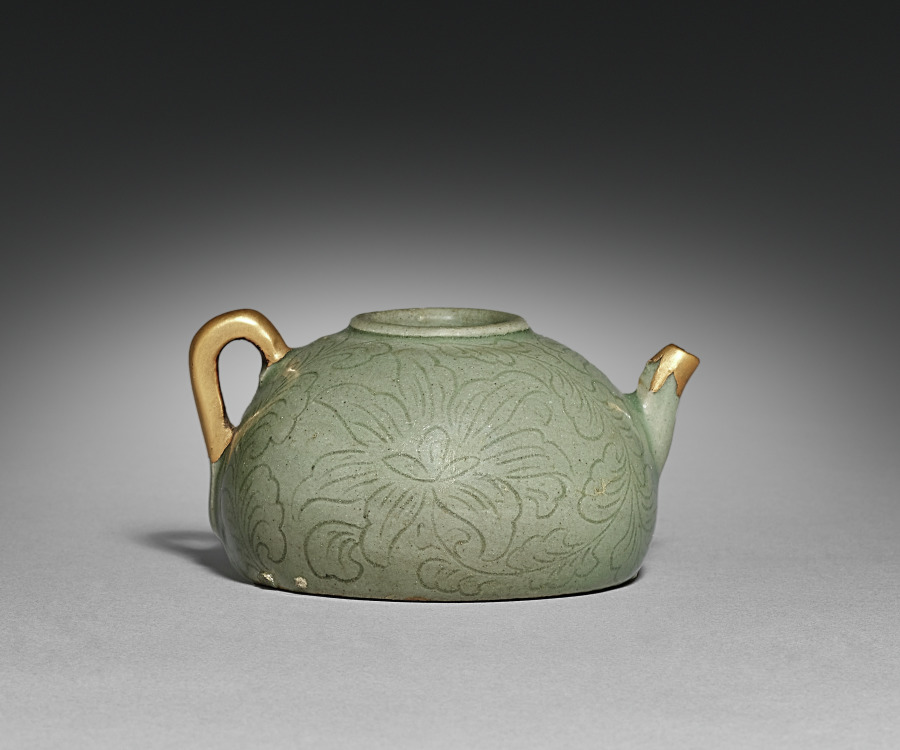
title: Wine Ewer with Incised Scroll Design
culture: Korea, Goryeo dynasty (918–1392)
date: 1100s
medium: celadon with incised and carved design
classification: Ceramic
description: Many celadon ceramics, such as these two miniature pots, have been repaired with gold lacquer. Termed kintsugi (literally meaning “gold joinery”) in Japanese, this restoration method highlights broken parts with glittering gold mixed with lacquer. Initiated in 15th-century Japan, the technique follows a popular aesthetic concept called wabi-sabi, which finds beauty in imperfect things. Goryeo celadons were considered rare treasures among early 20th-century Japanese collectors; thus, their broken condition is brilliantly highlighted in gold lacquer, as seen here in the repaired spouts, handle, and lid.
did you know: Termed kintsugi (literally meaning “gold joinery”) in Japanese, this method of repairing broken parts with glittering gold mixed with lacquer was extensively used for ceramic works in the Goryeo period, such as this one.